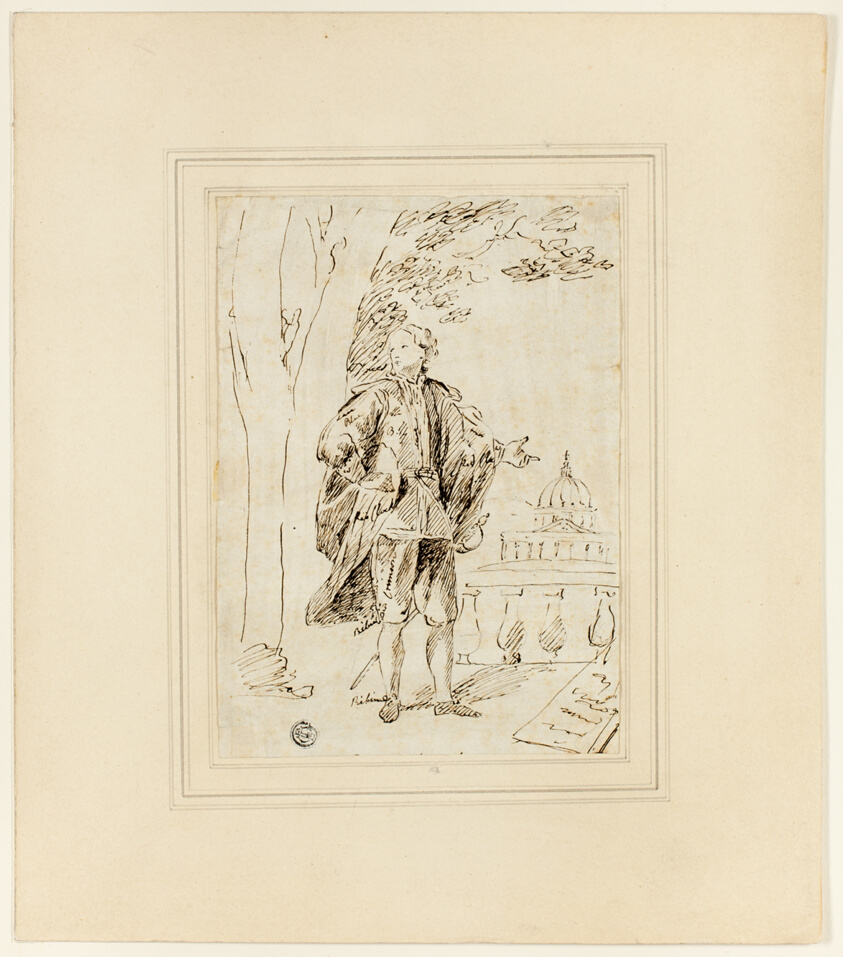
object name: Drawing and Watercolor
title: Full Length Portrait of a Man Standing near Balustrade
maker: John Vanderbank (English, 1686-1739)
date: c. 1737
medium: Pen and brown ink over graphite on ivory laid papper, tipped onto card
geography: England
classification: pen and ink drawings; drawings (visual works); prints and drawing